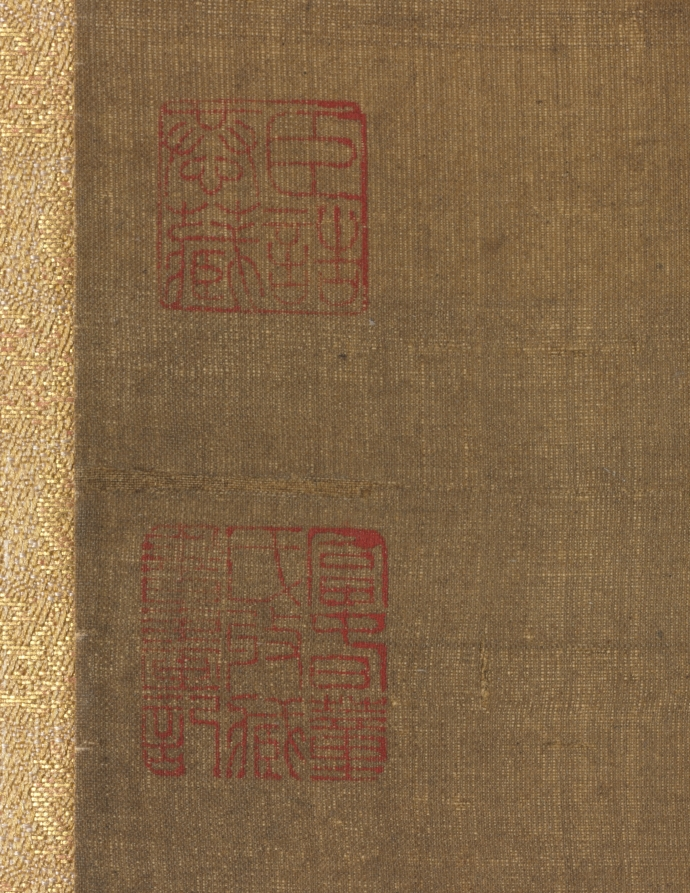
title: A Prunus in the Moonlight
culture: China, Yuan dynasty (1271-1368)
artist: Wang Mian (Chinese, 1287–1359)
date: 1300s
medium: Hanging scroll; ink on silk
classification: Painting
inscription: 8 additional seals: 6 of the Qianlong 乾隆 emperor (r. 1736-95); 2 of Dong Gao 董誥 (1740-1818).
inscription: 海雲初破月團團，獨鶴高飛夜未殘。/ 一片笙簫湖水上，玉妃含笑倚闌干。 王元章作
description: The plum flourishes in the mild climate of the south, and it was not before the Six Dynasties period (220– 589 CE) that the motif began to be appreciated by southern artists, many of whom had emigrated from the north. Wang Mian from Zhejiang province had failed the civil and military service examinations and later rejected appointments under the Mongol government. Instead, he chose to return home, making a living by selling plum paintings. Few of Wang’s works have survived, but they demonstrate that by his time the ink-plum (momei) genre was fully developed.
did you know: The painting portrays the plum in the nighttime, as indicated by the tint of the background and the presence of the moon.